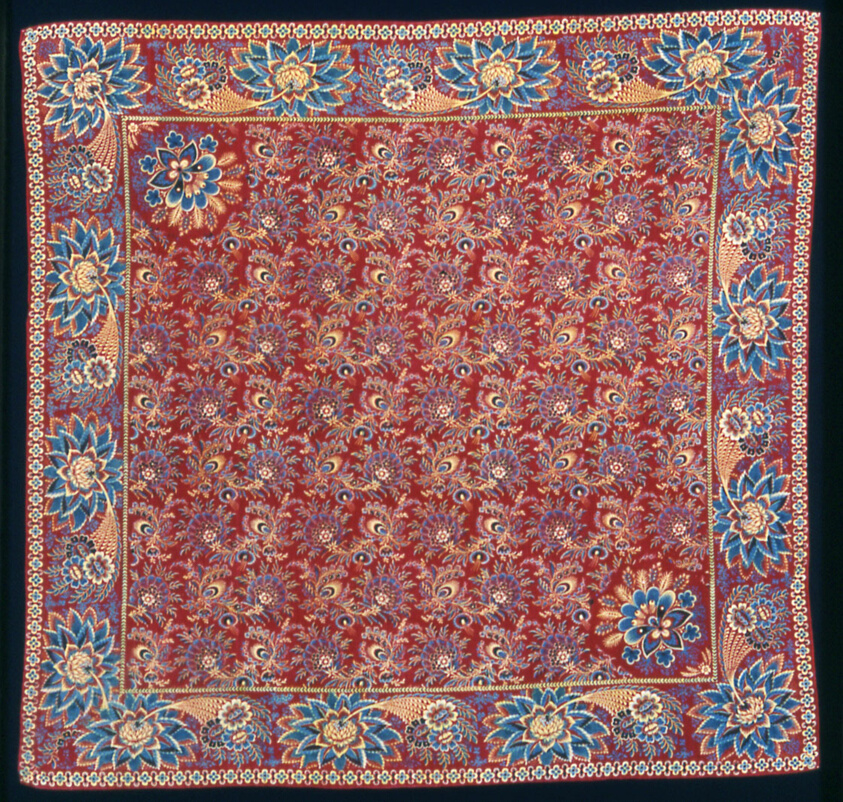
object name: Textile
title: Handkerchief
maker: France, Alsace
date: 1801/25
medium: Cotton, plain weave; roller printed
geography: France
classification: textile; weaving - printed; accessories (object genre)